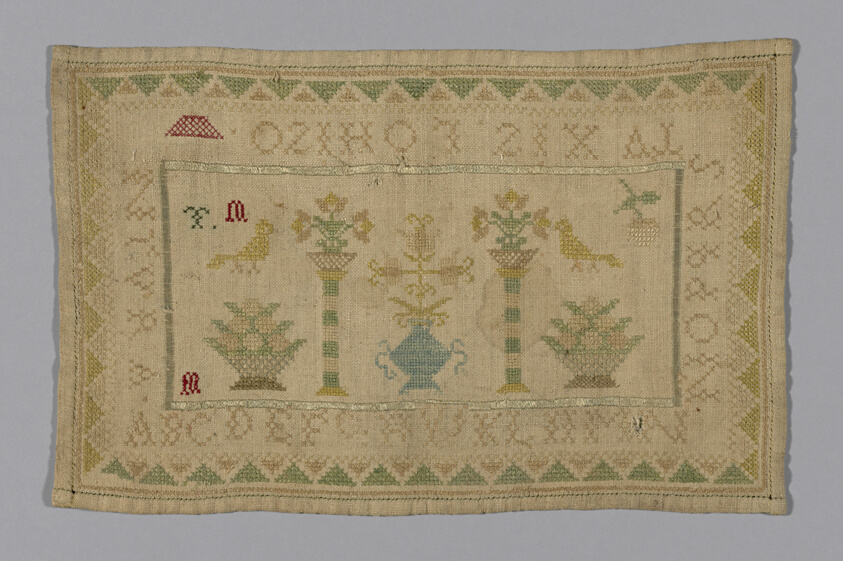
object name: Textile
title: Sampler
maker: France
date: 1775/1825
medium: Linen, plain weave; embroidered with cotton and silk in cross and satin stitch; all edges finished in feathered hem stitches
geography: France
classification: textile; needlework (visual works); sampler